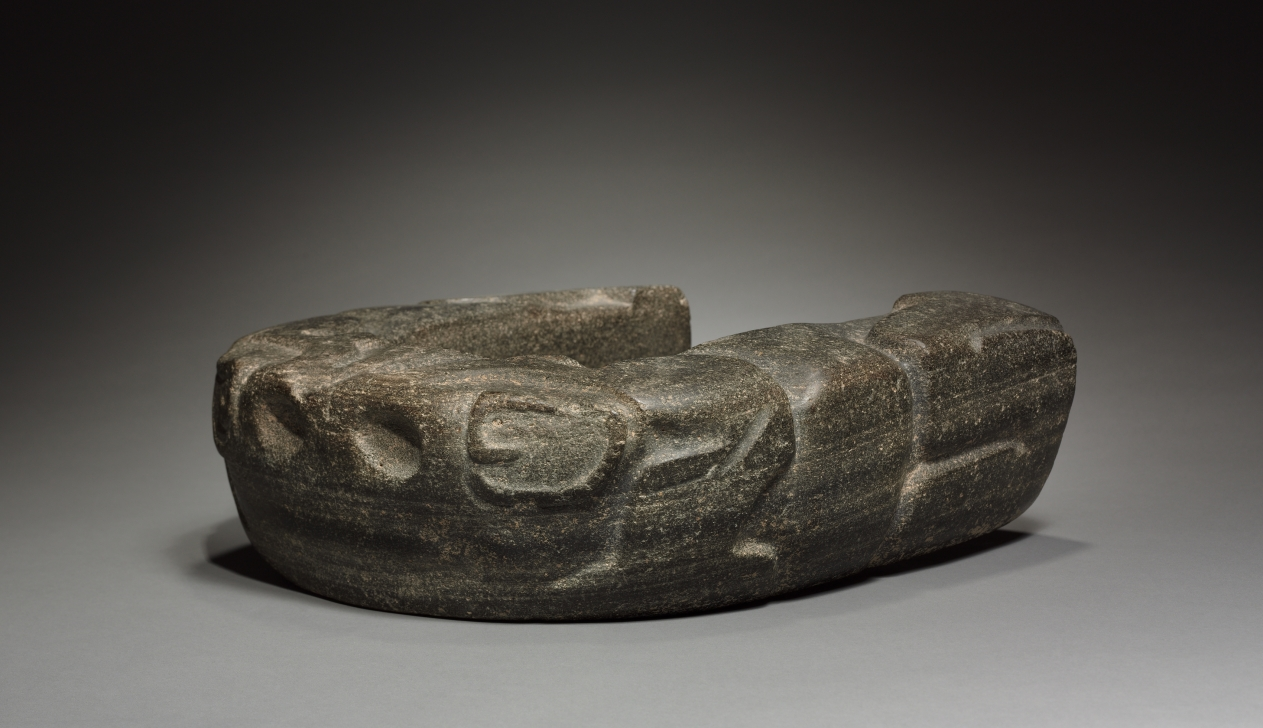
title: Unfinished Yoke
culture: Mexico, Central Veracruz, Classsic Veracruz style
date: 600–900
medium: gray stone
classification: Sculpture